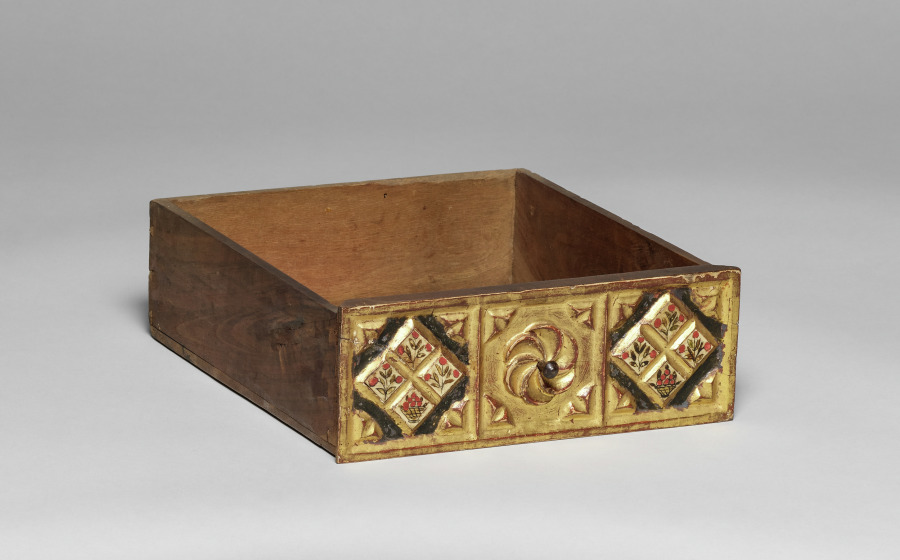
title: Chest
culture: Spain, Colonial, late 17th Century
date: late 1600s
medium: turned and joined wood, gilded and painted red with applied bone columns and bone inlays, wrought iron hardward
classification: Furniture and woodwork